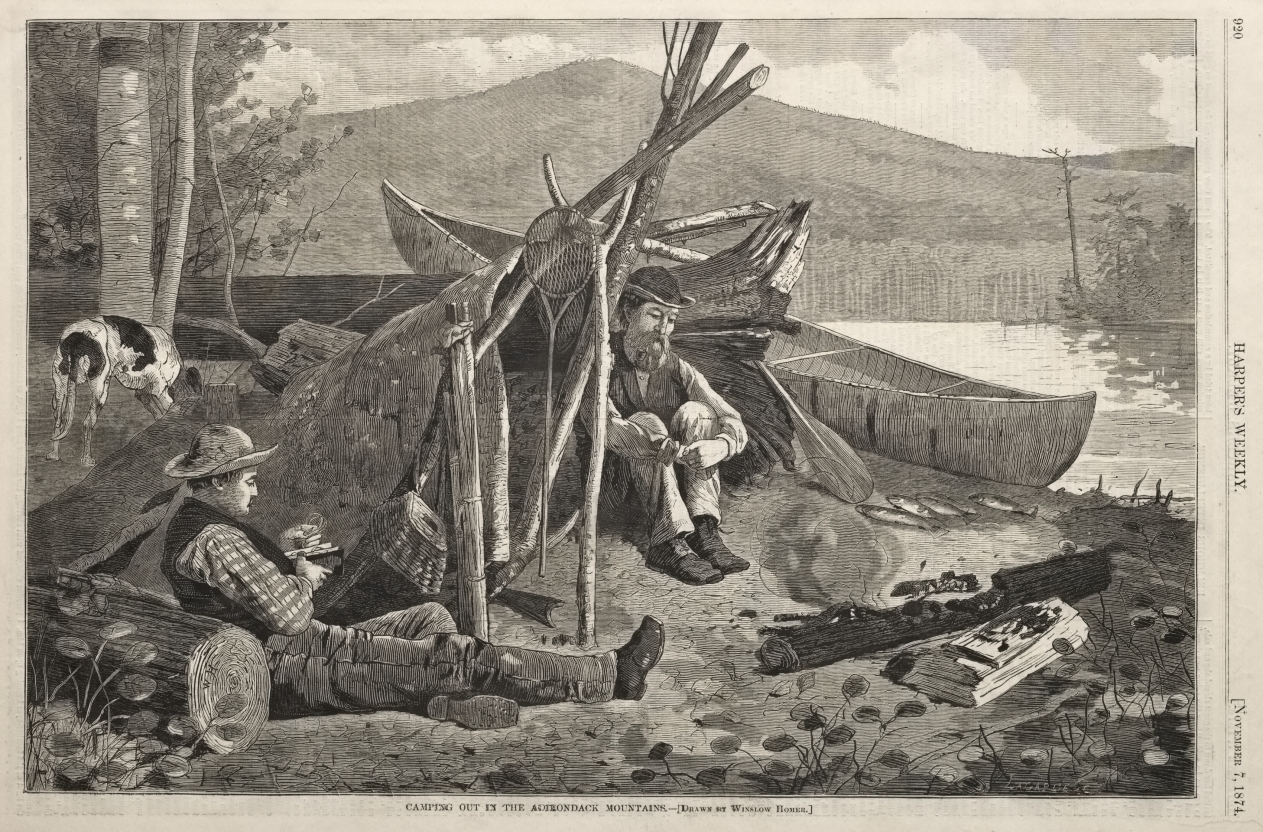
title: Camping Out in the Adirondack Mountains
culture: America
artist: Winslow Homer (American, 1836–1910)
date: 1874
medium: wood engraving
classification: Print